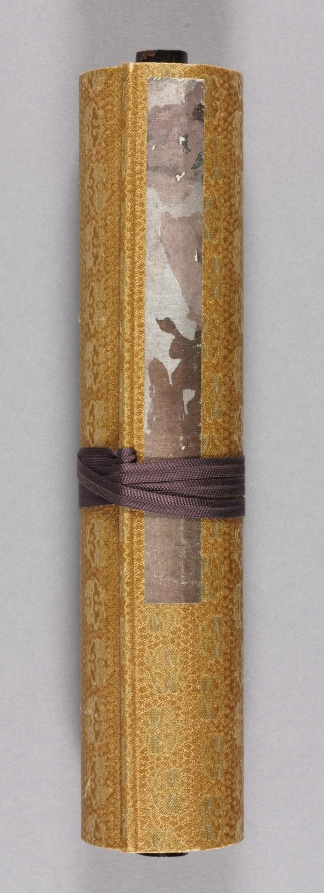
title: Selections from the New Collection of Japanese Poems from Ancient and Modern Times (Shinkokin wakashū) with Printed Designs of Chinese Lions and Crab Finger Grass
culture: Japan, Edo period (1615–1868)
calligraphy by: Hon'ami Kōetsu (Japanese, 1558–1637)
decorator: Tawaraya Sōtatsu (Japanese, c. 1570–c. 1640)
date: early 1600s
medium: handscroll; ink, gold, and silver on paper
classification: Calligraphy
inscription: Seal: 光悦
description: Hon’ami Kōetsu was a calligrapher and craftsman who frequently collaborated with the painter Tawaraya Sōtatsu, considered the first master of the Rinpa school. Kōetsu brushed seven poems from the autumn section of a poetry anthology onto dyed paper with motifs designed and printed in gold and silver by Sōtatsu.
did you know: Before becoming a master painter of screens, Tawaraya Sōtatsu painted fans.